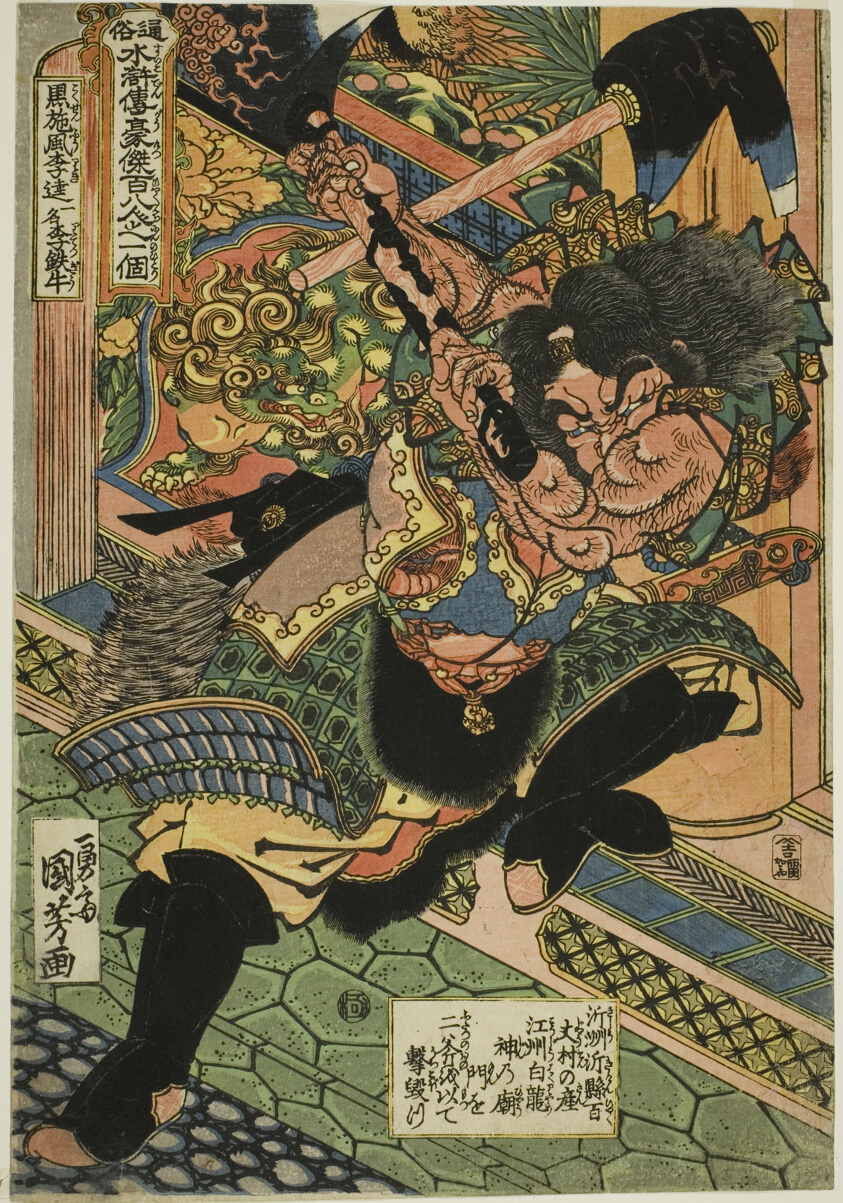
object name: Print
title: Li Kui (Kokusenpu Riki, ichimei Ritetsugyu), from the series "One Hundred and Eight Heroes of the Popular Water Margin (Tsuzoku Suikoden goketsu hyakuhachinin no hitori)"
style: Japanese (culture or style)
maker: Utagawa Kuniyoshi (Japanese, 1797-1861)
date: c. 1827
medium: Color woodblock print; oban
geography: Japan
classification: woodblock print; print; asian art